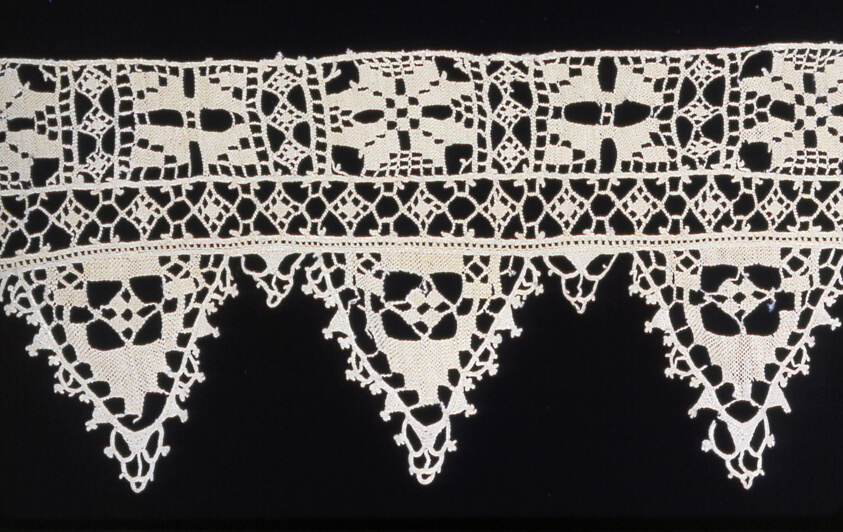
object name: Textile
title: Border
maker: Northern Italy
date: Probably 19th century (copy of early 17th century pattern)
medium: Linen, needle lace worked on a laid and plaited thread grid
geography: Northern Italy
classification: textile; lace - needle